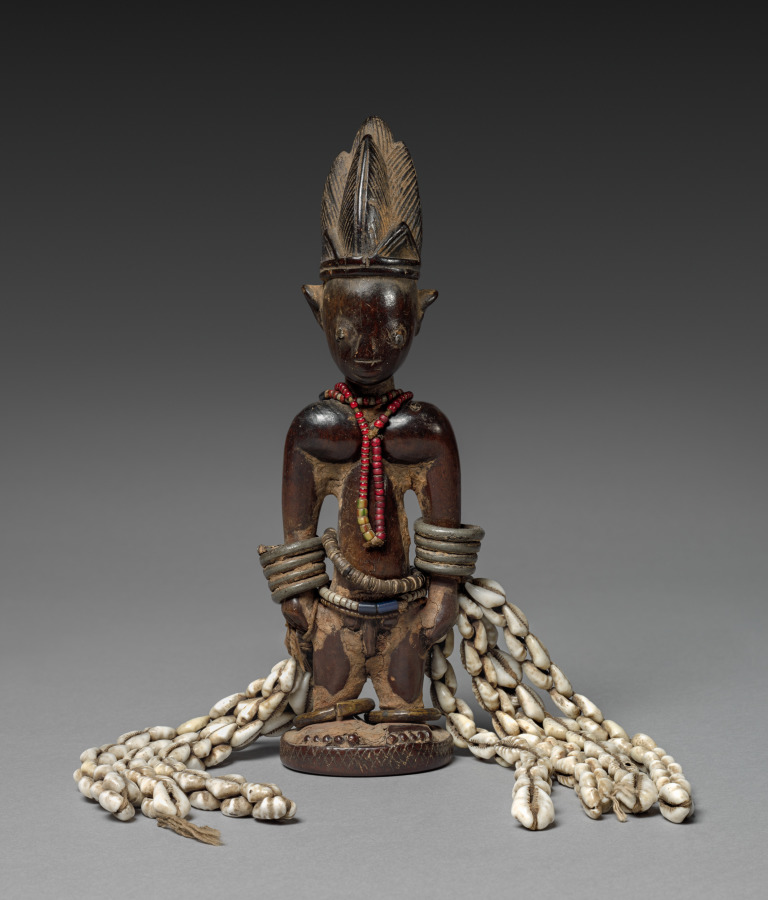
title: Twin Figure (Ère Ìbejì)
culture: Africa, West Africa, Nigeria, Yorùbá-style maker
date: late 1800s–early 1900s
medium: Wood, copper alloy, iron alloy, lead, glass beads, cowrie shells, twine, and pigment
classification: Sculpture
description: Such a figure is carved when a twin dies in infancy and serves as a memorial to the surviving sibling. These twin figures are always carved to look like adult individuals with idealized physical features. Various body adornments suggest the care parents devote to their children, while the erosion of facial features indicates the symbolic washing and feeding of the figure as a means to connect the soul of the deceased to that of the living twin.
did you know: This figure commemorates a twin that has died in infancy.